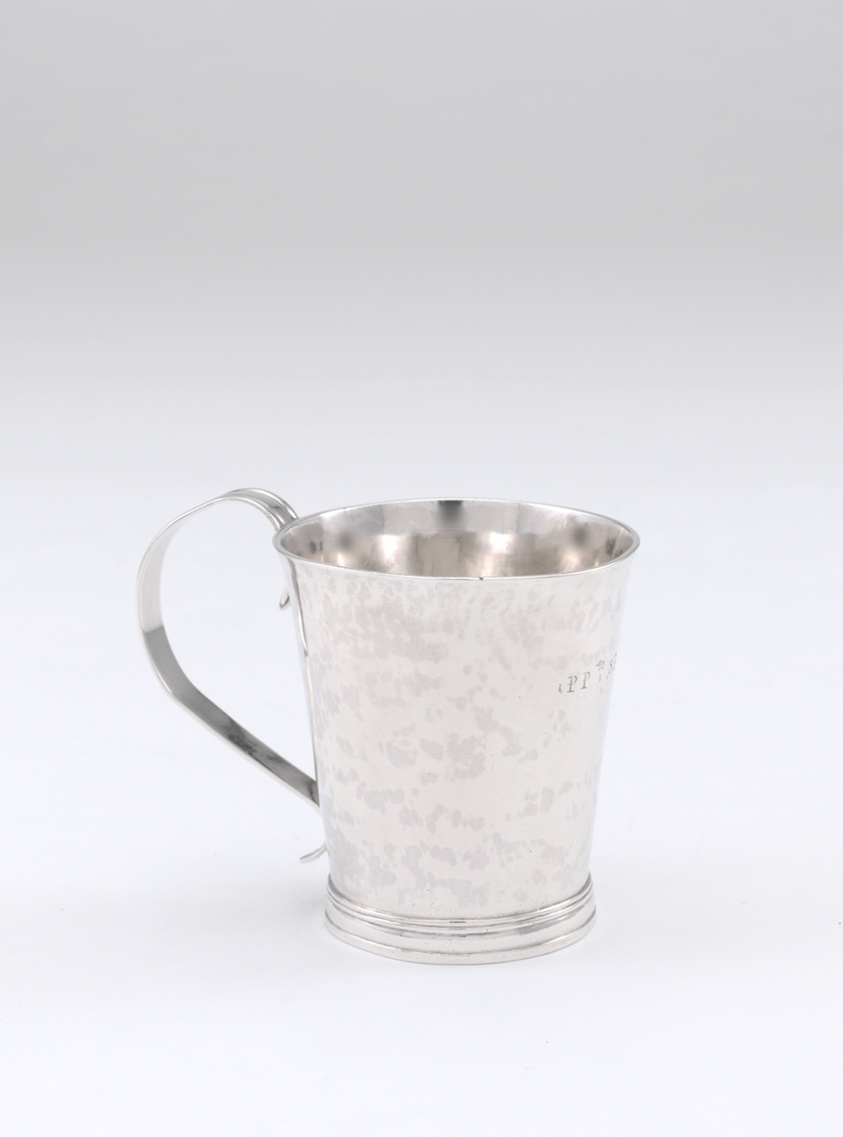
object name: Metalwork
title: Cup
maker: Joseph Loring (American, 1743–1815); Boston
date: 1764–75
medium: Silver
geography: Boston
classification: drinking vessel; silver; american decorative arts; american arts; decorative arts